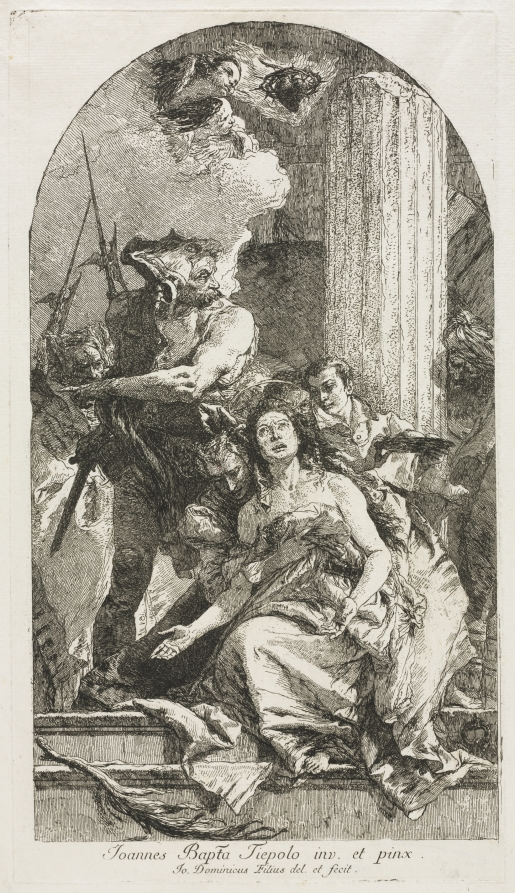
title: Martyrdom of St. Agatha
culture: Italy, 18th century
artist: Giovanni Domenico Tiepolo (Italian, 1727–1804)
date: c. 1755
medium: etching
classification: Print